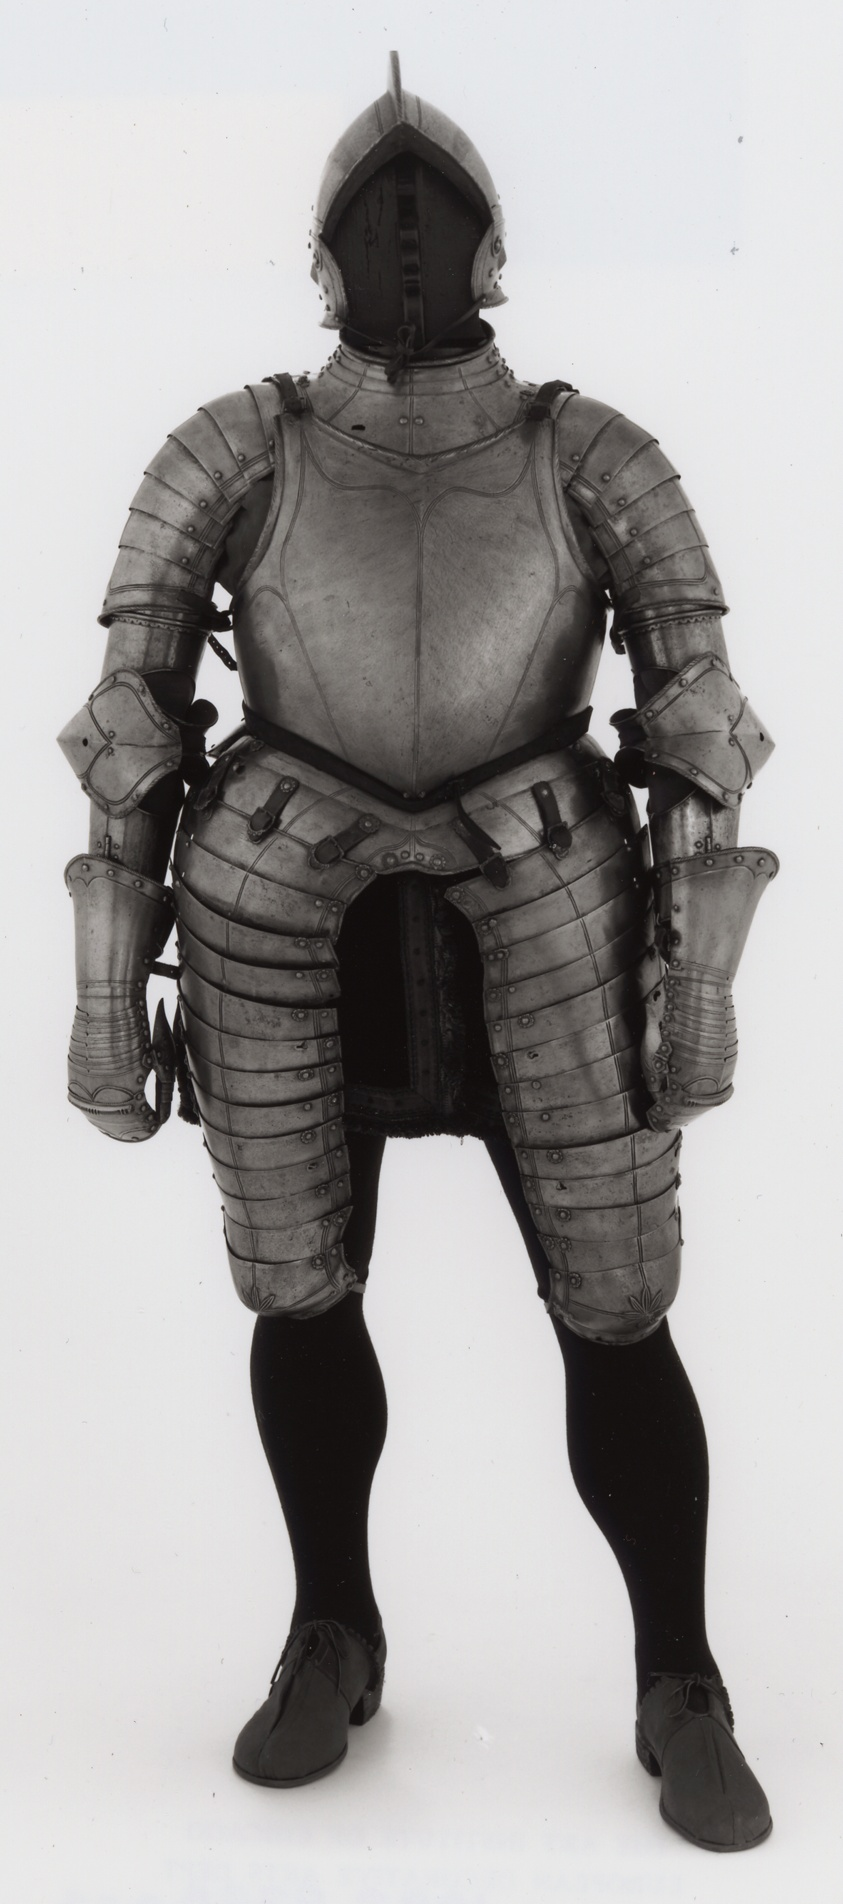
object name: Armor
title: Infantry Armor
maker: Northern German, Brunswick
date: 1575/85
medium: Steel and leather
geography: Germany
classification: suit; armor; arms and armor